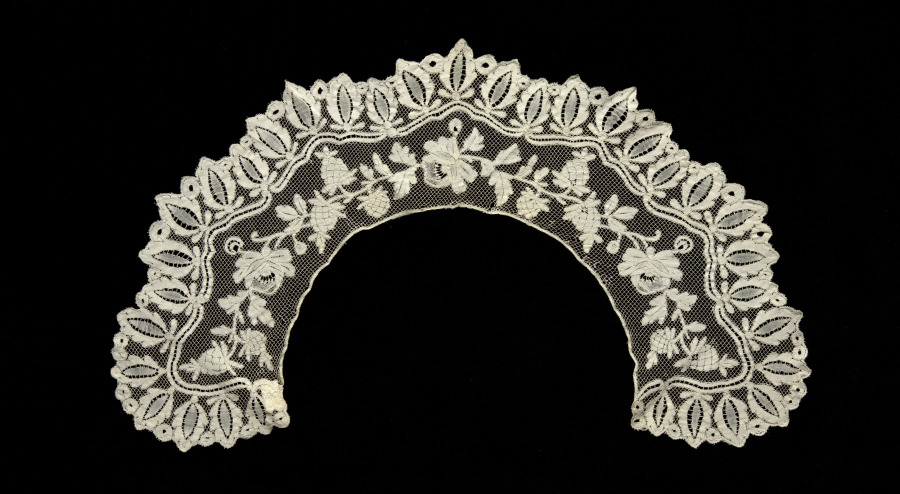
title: Lace Collar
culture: France, Valenciennes or Flanders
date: 1800s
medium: Linen: bobbin lace (Valenciennes)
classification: Lace